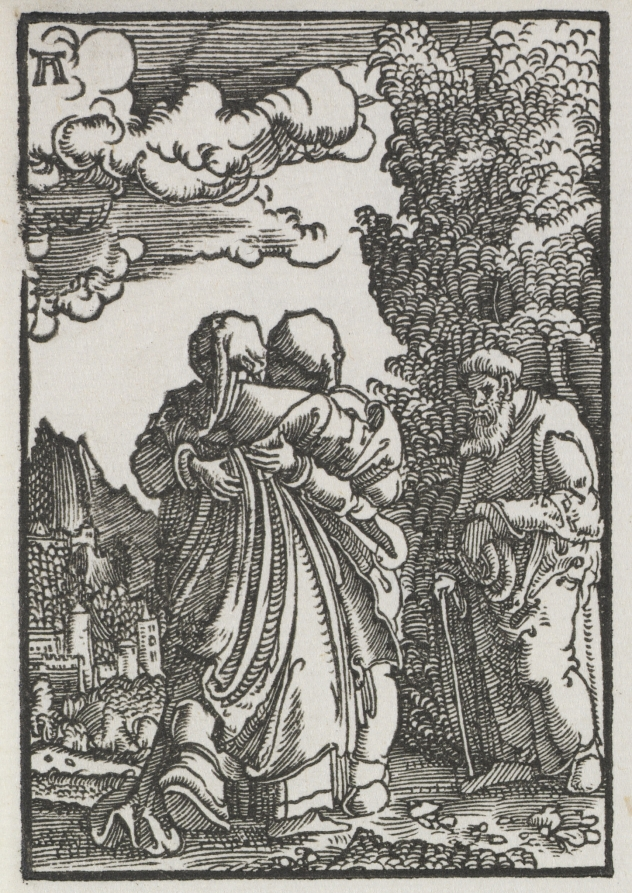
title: The Fall and Redemption of Man: The Visitation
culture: Germany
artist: Albrecht Altdorfer (German, c. 1480–1538)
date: c. 1515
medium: woodcut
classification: Print